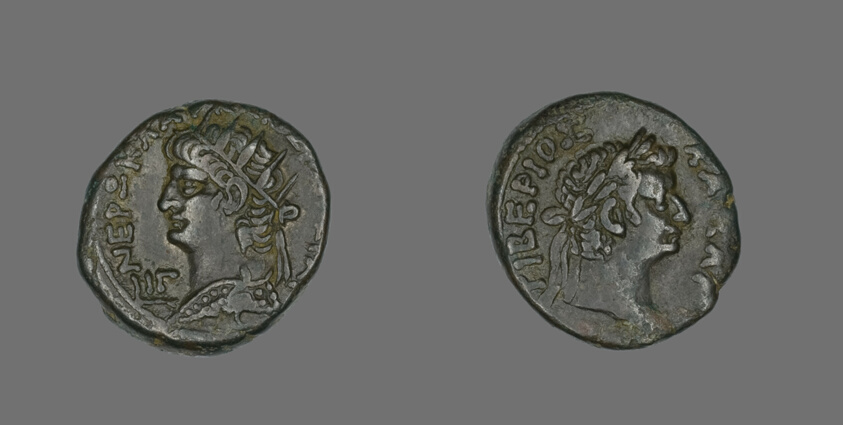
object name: Coin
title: Tetradrachm (Coin) Portraying Emperor Nero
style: roman period (egyptian), greco-roman (egyptian)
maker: Roman, minted in Alexandria, Egypt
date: 66-67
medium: Billon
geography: Egypt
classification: coin; ancient art